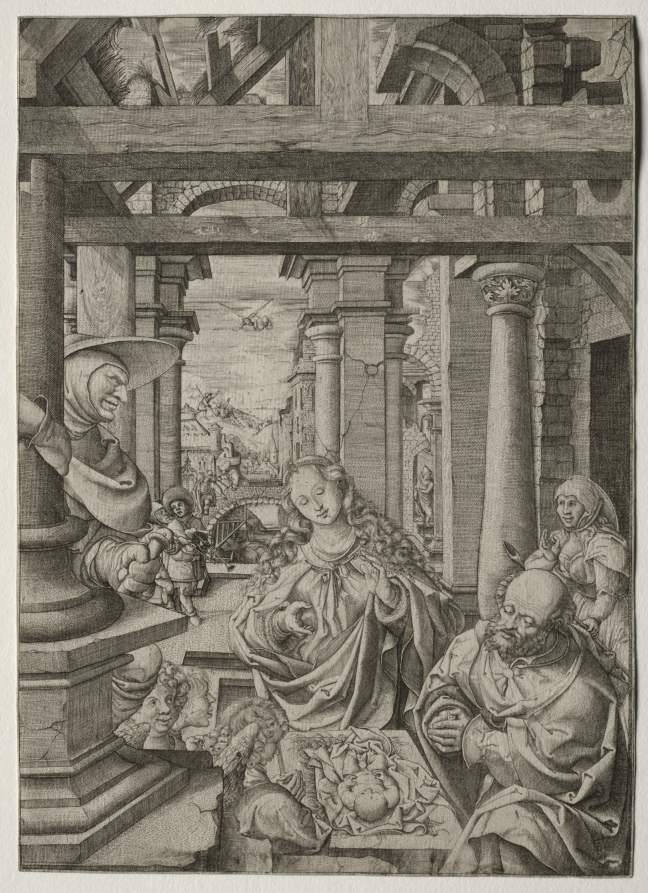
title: Adoration of the Shepherd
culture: Flanders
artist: Frans Crabbe van Esplegem (Flemish, c. 1480–1552)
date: c. 1522–25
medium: engraving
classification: Print